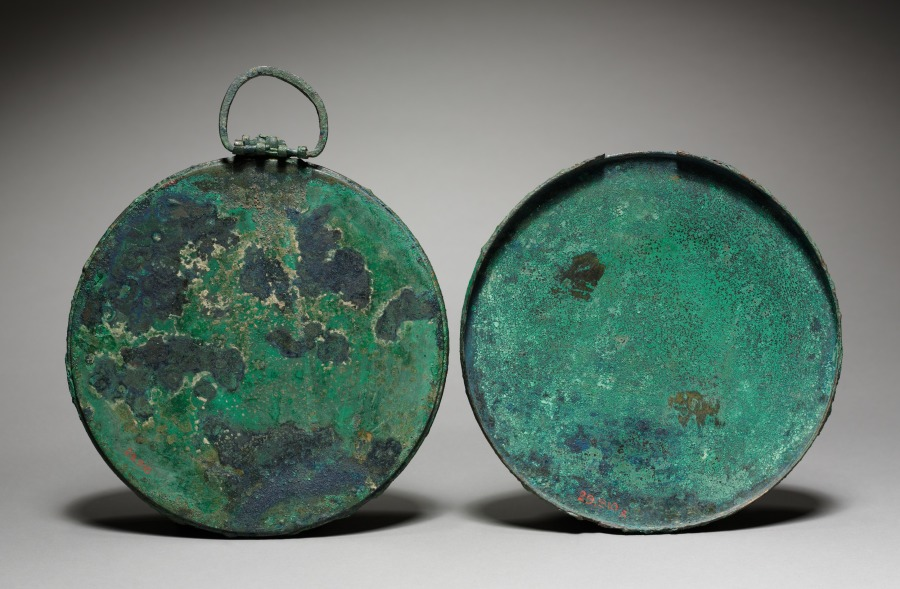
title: Mirror Case with Cover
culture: Greece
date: 300s BCE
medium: bronze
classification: Metalwork